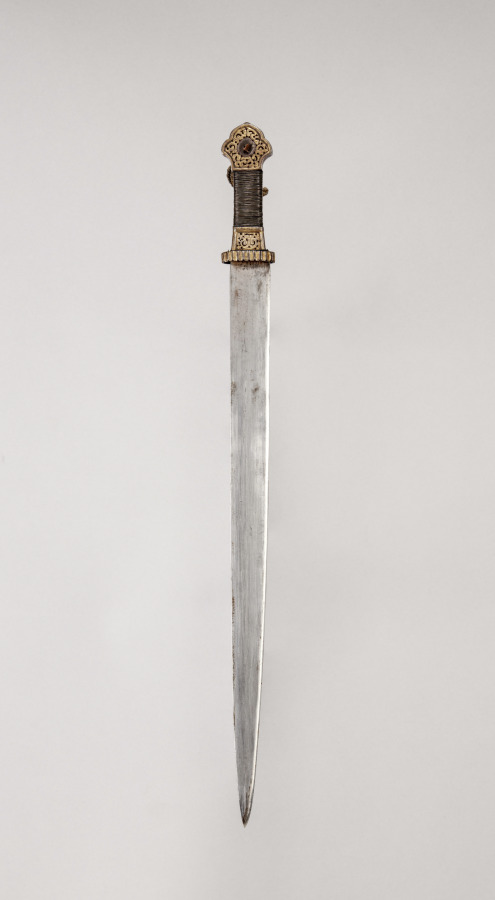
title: Sword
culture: India, Bhutan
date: 1800s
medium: iron with gilt and leather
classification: Arms and Armor